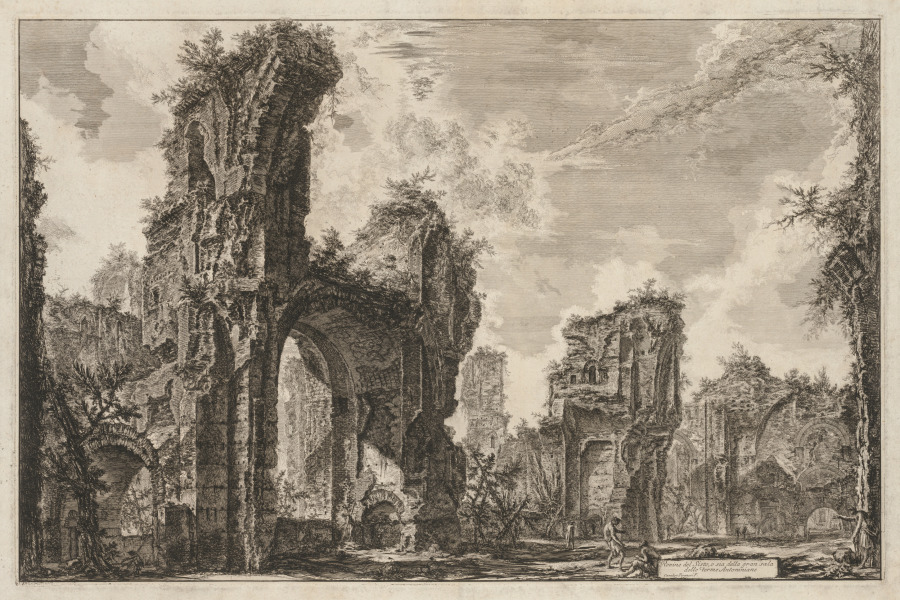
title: Views of Rome: Rovine del Sisto o sia della gran sala delle Terme Antoniniane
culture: Italy, 18th century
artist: Giovanni Battista Piranesi (Italian, 1720–1778)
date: 1765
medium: etching and engraving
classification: Print